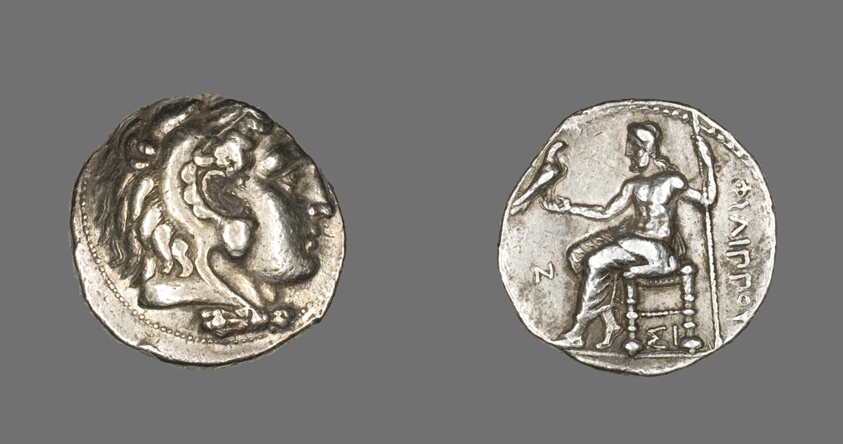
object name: Coin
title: Tetradrachm (Coin) Portraying Alexander the Great as Herakles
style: hellenistic, ancient, greek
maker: Greek; minted in Sidon, ancient Phoenicia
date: 323-317 BCE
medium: Silver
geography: Macedonia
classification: coin; ancient art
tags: alexander the great, zeus, Heracles